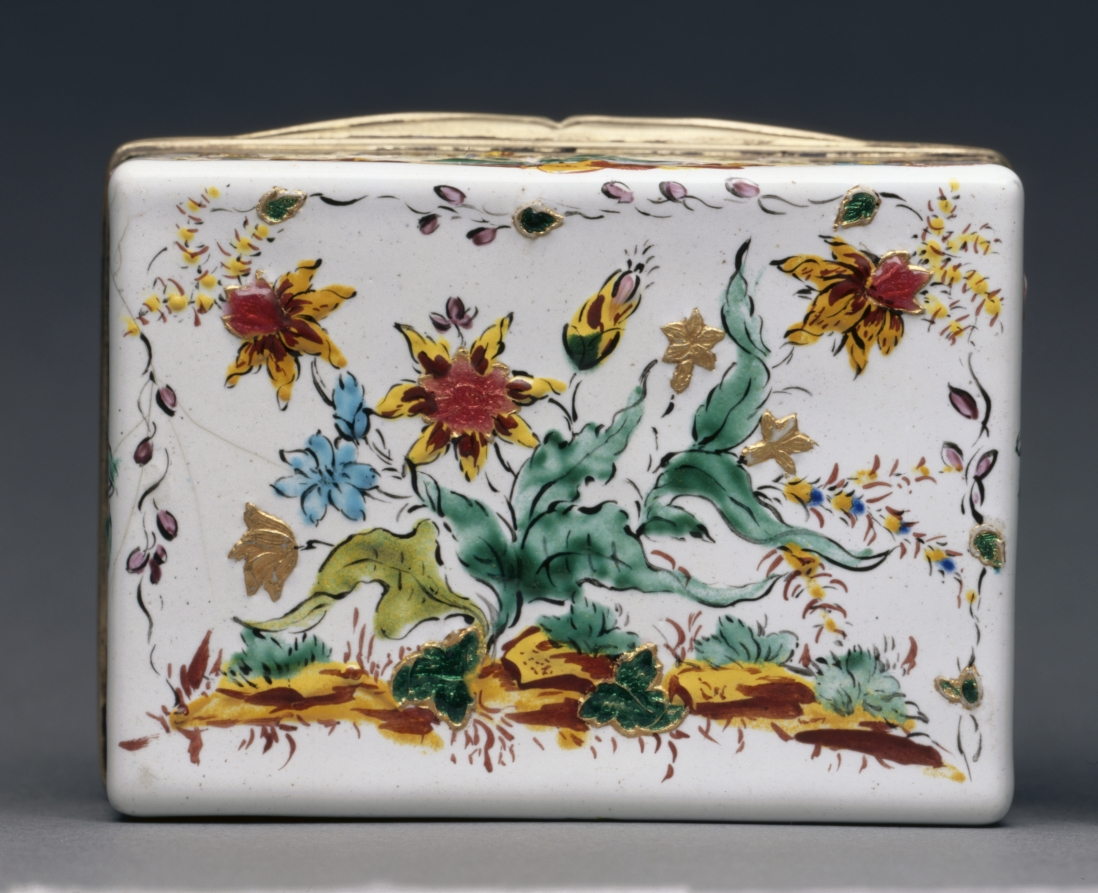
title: Box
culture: France, 18th century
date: 1749–50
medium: silver gilt and enamel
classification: Enamel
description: Chinoiserie in 18th-century France incorporated imitations of East Asian motifs, designs, and ornaments into European art. These imitations were often distorted by the European imagination and were not accurate representations of the cultures from which they drew inspiration. Elements of chinoiserie in this box can be seen primarily on the lid where enormous, vibrantly colored flowers tower over two crouching figures and a grouping of buildings.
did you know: The flower petals on the box lid are raised, an effect produced by drops of transparent enamel placed on the box’s surface that imitates polished gemstones or pearls.